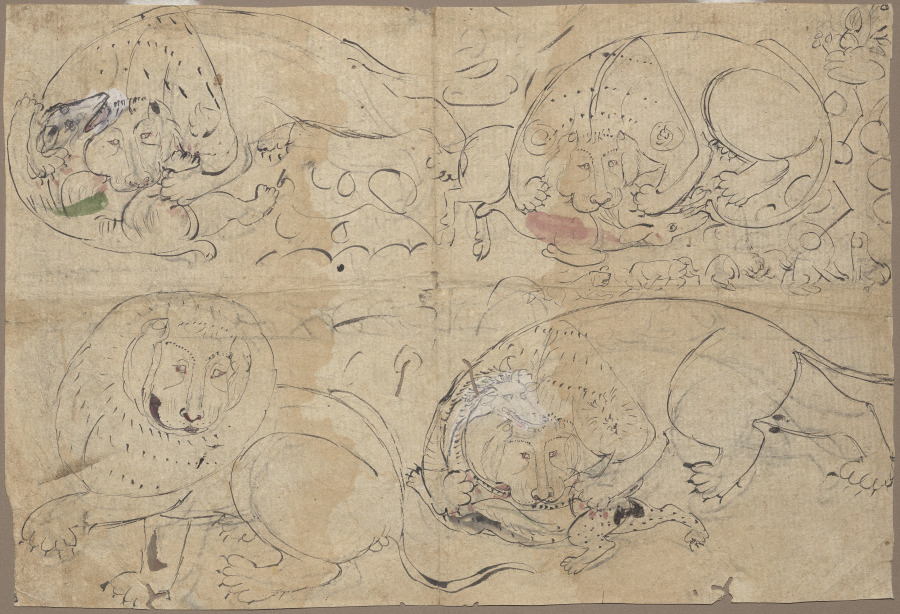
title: Studies of a Lion Killing Prey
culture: India, Kotah school, c. 19th century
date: c. 1800s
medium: ink on paper; drawing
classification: Drawing